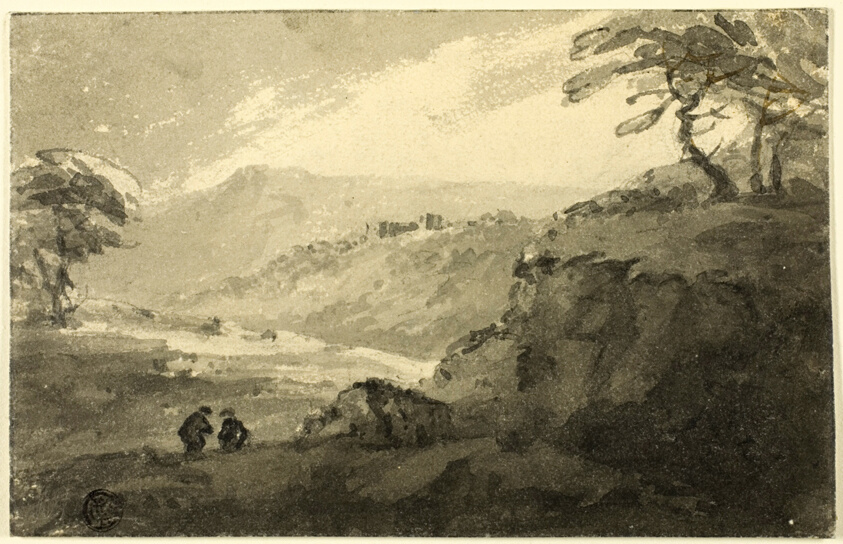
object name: Drawing and Watercolor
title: Scottish Landscape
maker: William Sawrey Gilpin (English, 1762-1843)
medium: Brush and gray wash with touches of brown ink, over graphite, on cream wove card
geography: England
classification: ink or chalk wash; drawings (visual works); prints and drawing